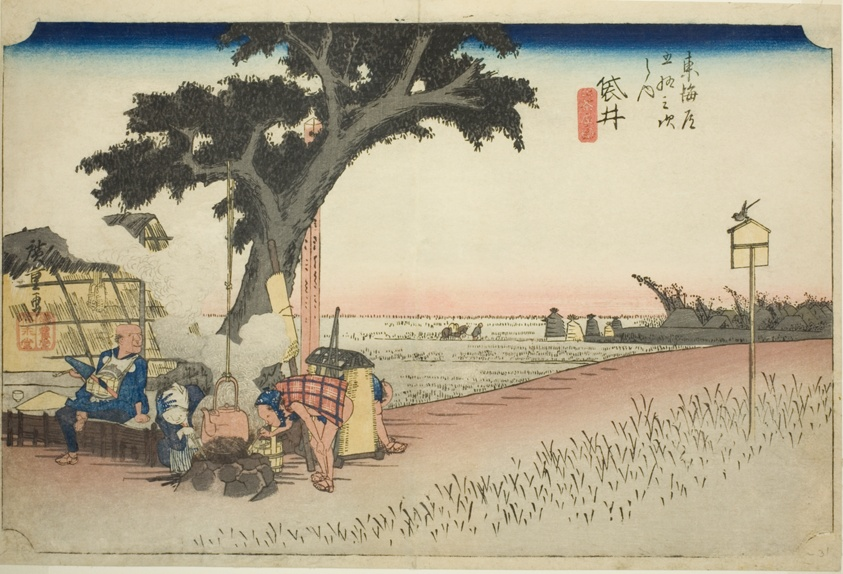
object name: Print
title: Fukuroi: Tea Stall (Fukuroi, dejaya no zu), from the series "Fifty-three Stations of the Tokaido (Tokaido gojusan tsugi no uchi)," also known as the Hoeido Tokaido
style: Japanese (culture or style)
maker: Utagawa Hiroshige 歌川 広重; Japanese, 1797-1858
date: c. 1833/34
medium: Color woodblock print; oban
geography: Japan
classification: woodblock print; print; asian art